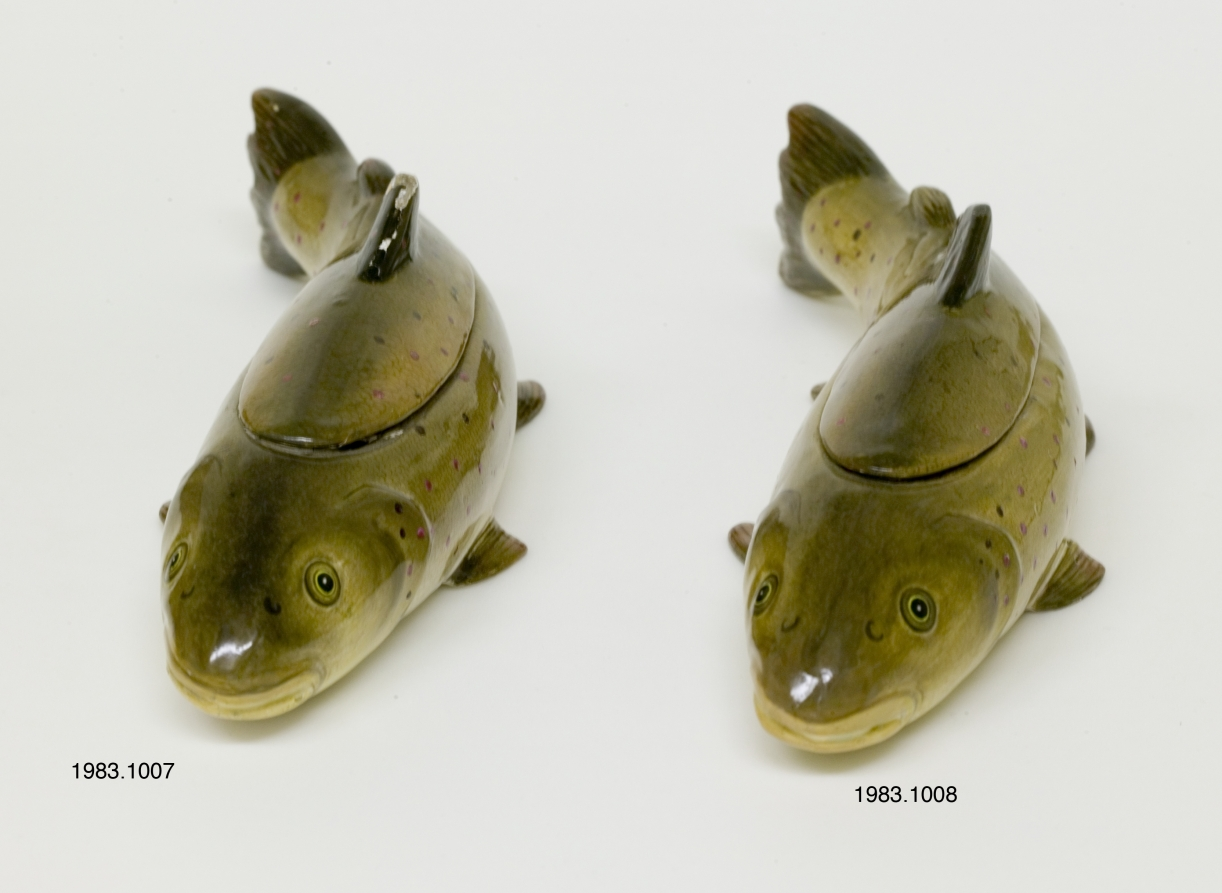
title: Box in the Form of a Fish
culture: France, Niderviller, 18th century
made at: Niderviller Factory (French)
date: 1767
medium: ceramic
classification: Ceramic